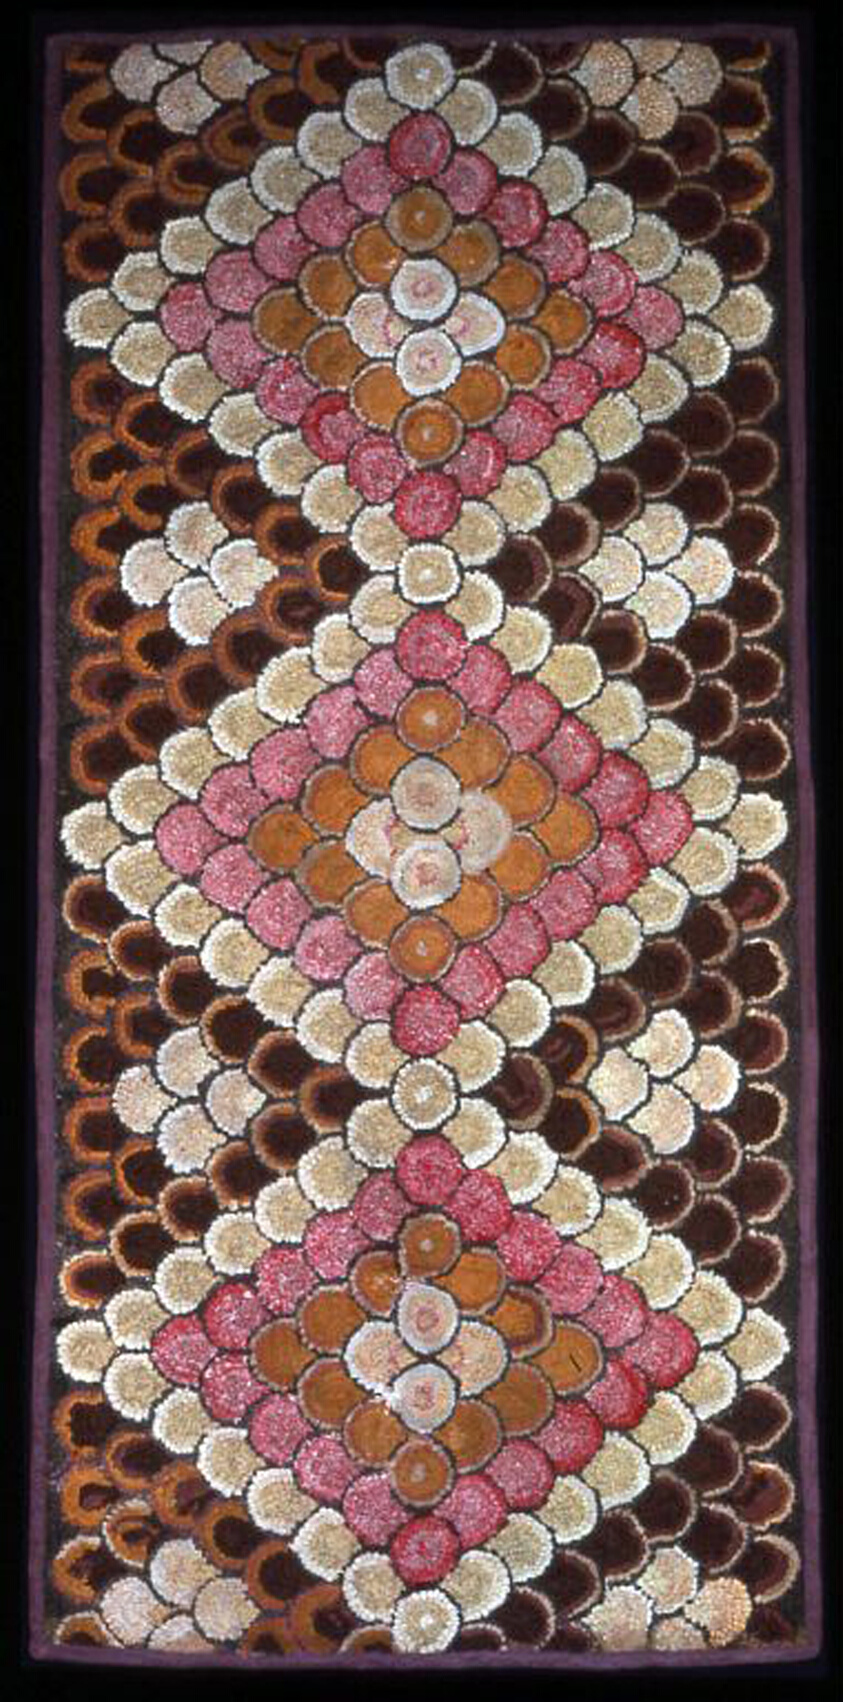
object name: Textile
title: Rug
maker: United States, probably New England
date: c. 1885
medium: Variety of fibers, plain weave, with variety of fibers, yarns, felted, knitted, oblique interlaced and/or woven strips, forming "hooked" pile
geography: United States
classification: textile; needlework - rug